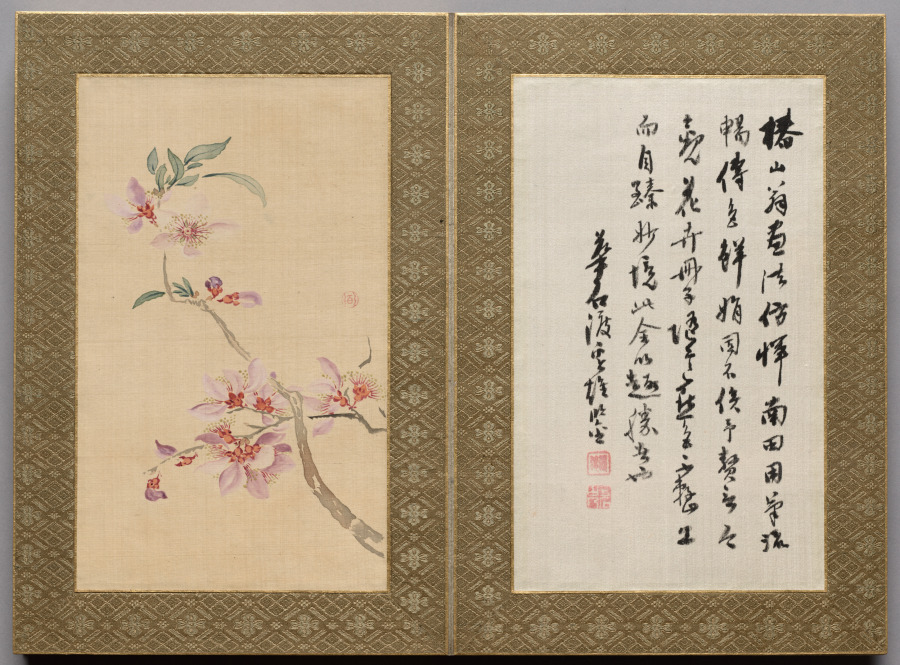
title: Preface from Flowers and Grasses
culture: Japan, Edo period (1615–1868)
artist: Tsubaki Chinzan (Japanese, 1801–1854)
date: 1841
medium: leaf from folding-album; ink on paper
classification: Painting